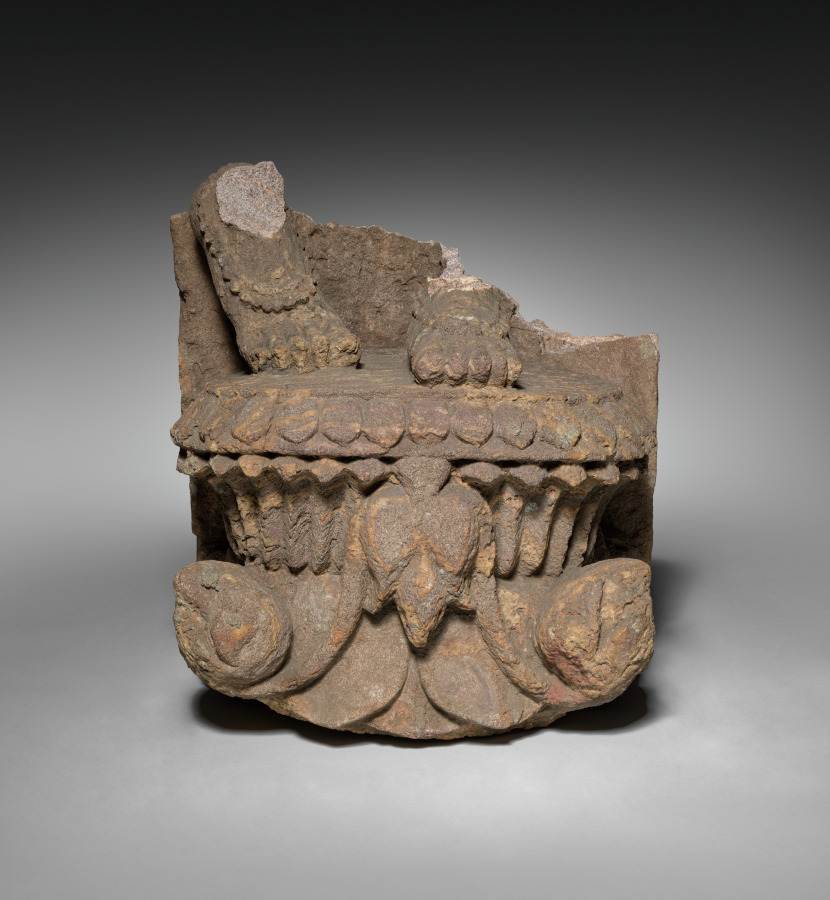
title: Base and Feet of Devata or Yakshi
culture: India, Province of Orissa, 20th century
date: 20th century fake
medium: sandstone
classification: Sculpture